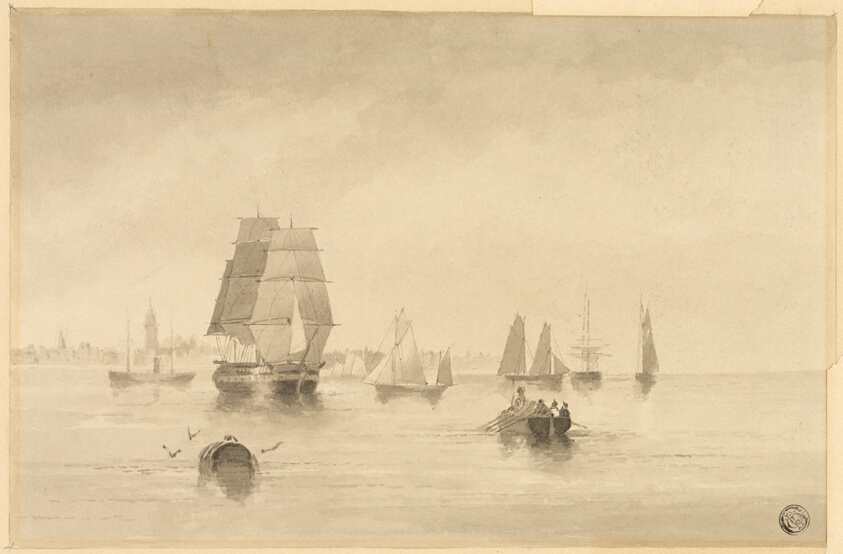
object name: Drawing and Watercolor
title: Rye - South Coast Near Hastings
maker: Attributed to Edward William Cooke; English, 1811-1880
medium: Brush and gray wash, with touches of pen and gray ink and traces of graphite, on cream wove paper, laid down on tan board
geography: England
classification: ink or chalk wash; drawings (visual works); prints and drawing